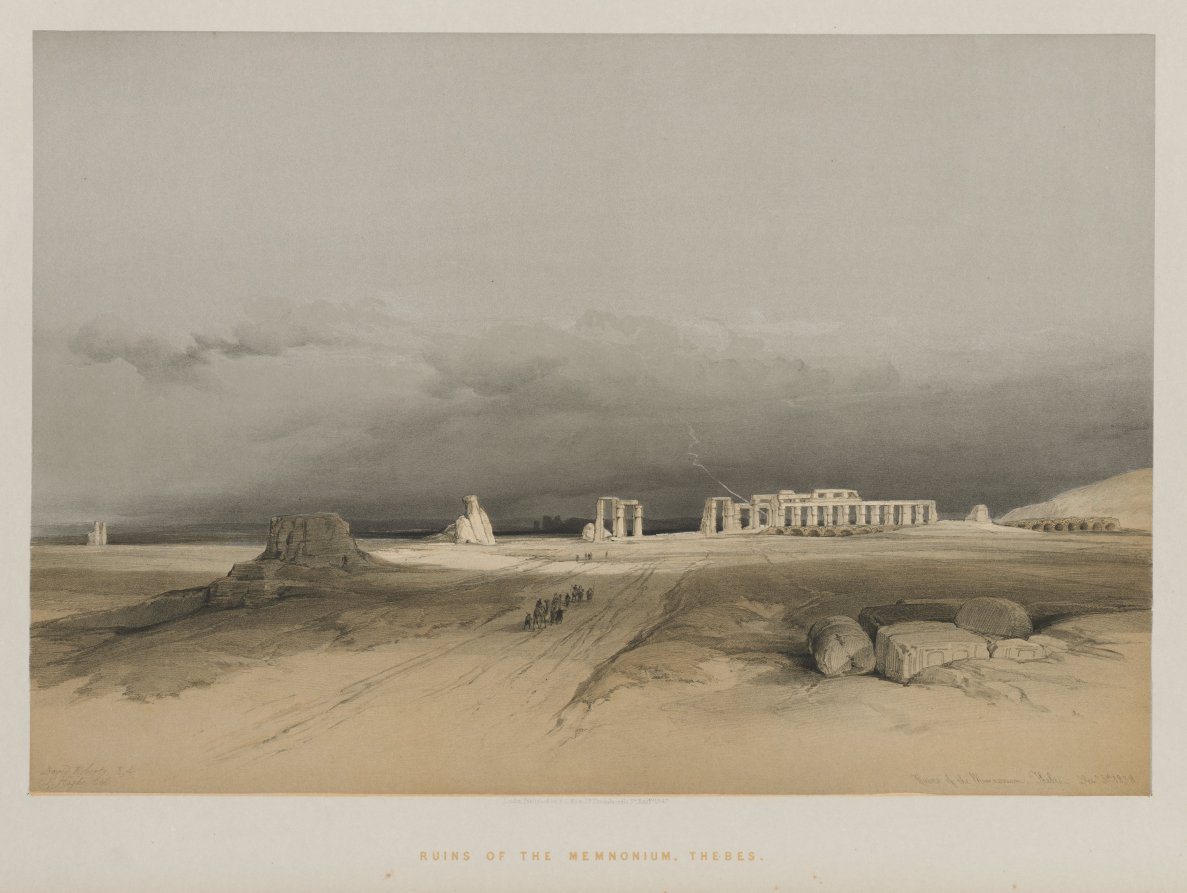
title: Egypt and Nubia, Volume II: Ruins of Memnonium, Thebes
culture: England, 19th century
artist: Louis Haghe (British, 1806–1885)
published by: F. G. Moon, 20 Threadneedle Street, London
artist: after David Roberts (Scottish, 1796–1864)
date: 1847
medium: color lithograph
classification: Print